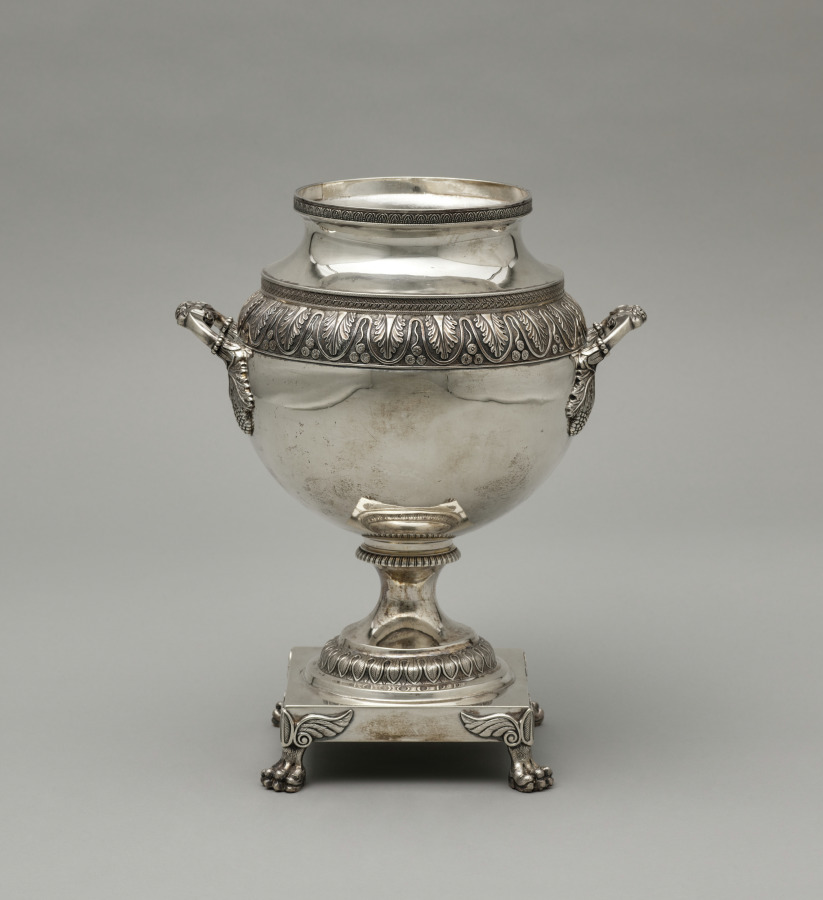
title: Tea Urn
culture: America, Pennsylvania, Philadelphia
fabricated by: Harvey Lewis (American, 1835)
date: 1811–25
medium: silver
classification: Silver